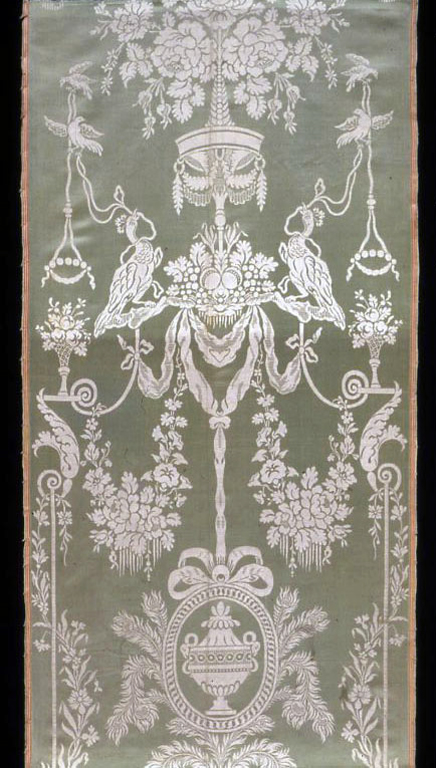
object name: Textile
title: Two Panels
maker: France, Lyon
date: 1775/1800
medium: Silk, warp-float faced 7:1 satin weave with plain interlacings of secondary binding warps and self-patterning ground wefts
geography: Lyon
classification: textile; weaving